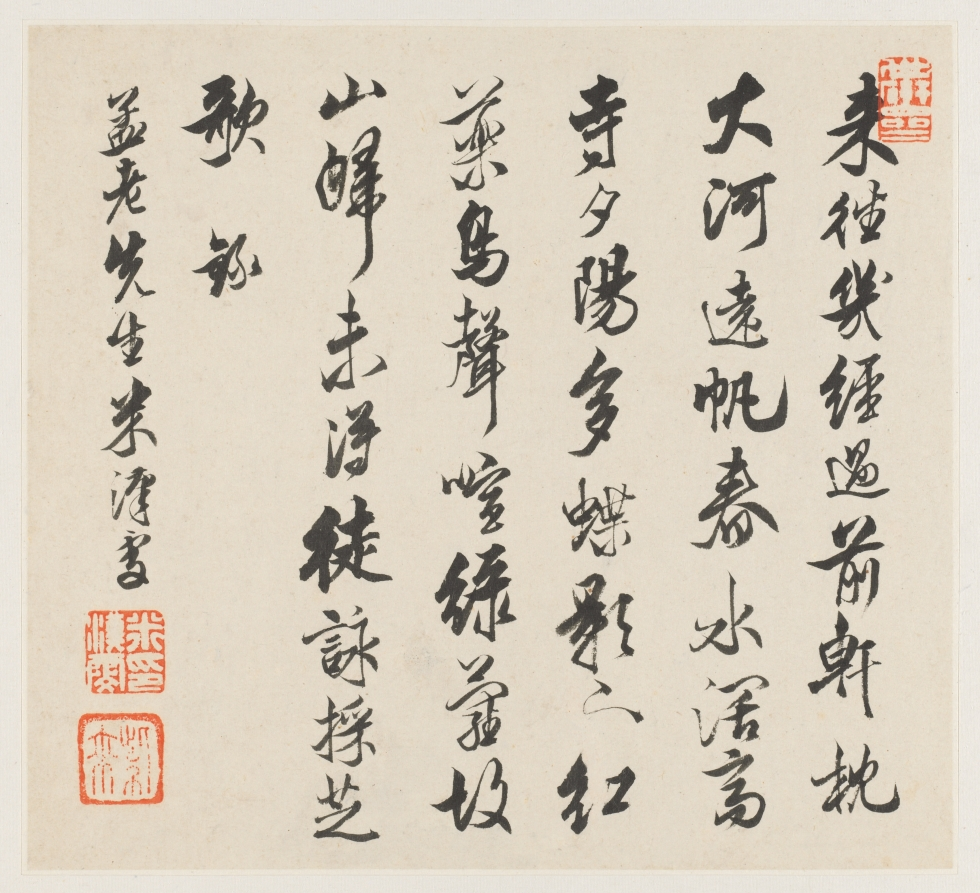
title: Album of Landscapes: Leaf 4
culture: China, Qing dynasty (1644-1911)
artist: Wang Gai (Chinese, active c. 1677–1705)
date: 1677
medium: album leaf, ink and light color on paper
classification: Painting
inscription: Poem by Mi Han-wen